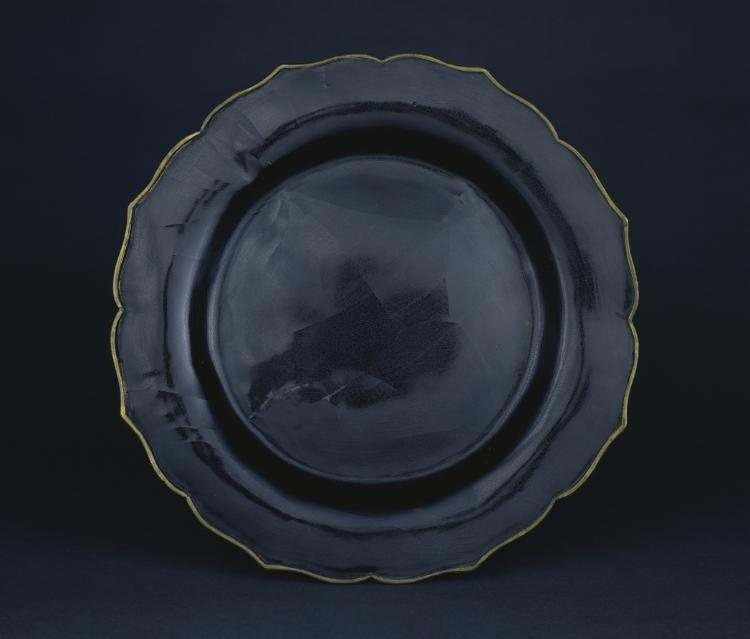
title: Foliate Dish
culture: China, Southern Song Dynasty (1127-1279) - Yuan Dynasty (1271-1368)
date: 1200s–1300s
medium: lacquer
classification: Lacquer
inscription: Red lacquer seal on base of plate.